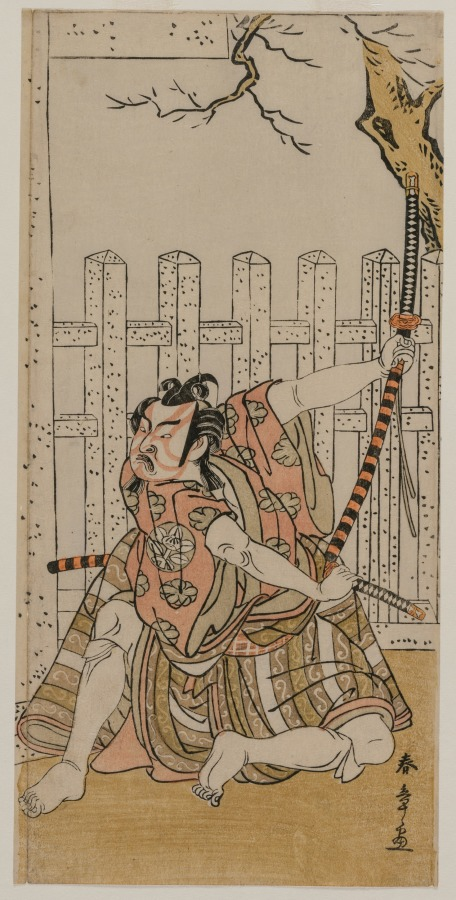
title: Ichimura Uzaemon IX as Umeomaru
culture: Japan, Edo period (1615–1868)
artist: Katsukawa Shunshō (Japanese, 1726–1792)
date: mid 1770s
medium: color woodblock print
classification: Print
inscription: Signature: Shunsho ga